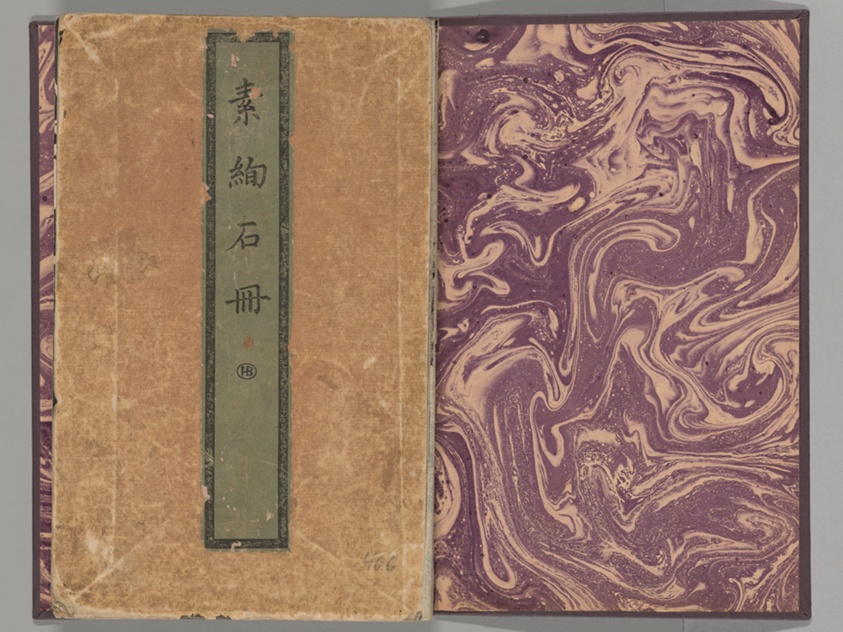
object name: Book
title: Soken sekisatsu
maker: Ito Jakuchu (Japanese, 1716-1800)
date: 1767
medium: Woodblock printed book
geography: Japan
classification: book